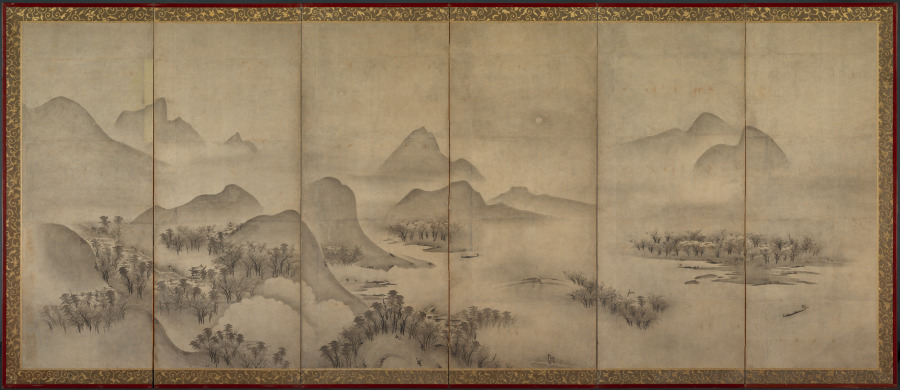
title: Moonlit Landscape (one of a pair)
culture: Japan, Muromachi period (1392–1573)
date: late 1500s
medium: six-panel folding screen, ink on paper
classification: Painting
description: This unsigned and unsealed composition includes imagery from the Eight Views of the Xiao and Xiang Rivers. Scanning the composition from right to left, four of the Eight Views subjects appear: sunset glow over a fishing village, returning sails off a distant shore, autumn moon over Lake Donting, and evening bell from a mist-shrouded temple. Not all the elements of the traditional Eight Views theme are here, but the artist suggests its literary presence by leading the viewer through a summer’s journey from one day to the next, aided, like the travelers in the landscape, by the light of the moon.